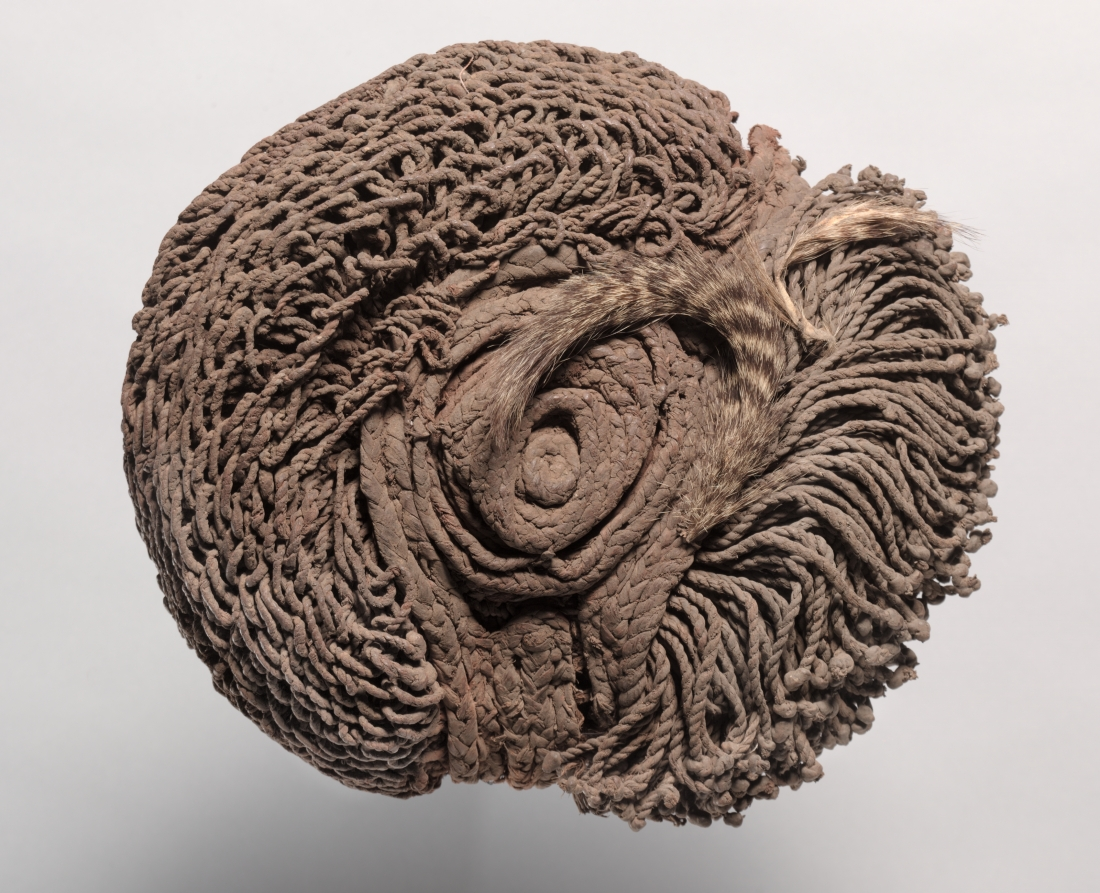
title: Wig (uyembe matota, wiyembe, or pulumba)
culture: Central Africa, Democratic Republic of the Congo or Angola, Chokwe, early to mid 20th century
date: early to mid 1900s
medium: Plant fiber, pelt, and clay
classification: Garment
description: Among the Chokwe, hats, diadems, and wigs of all sorts made in a variety of materials were once commonly worn by both men and women. Some were exclusive to religious and political titles. This wig imitates a female hairstyle in vogue until the 1960s. Made by a male craftsman, it was most typically worn by a woman at dances and other public festivals.